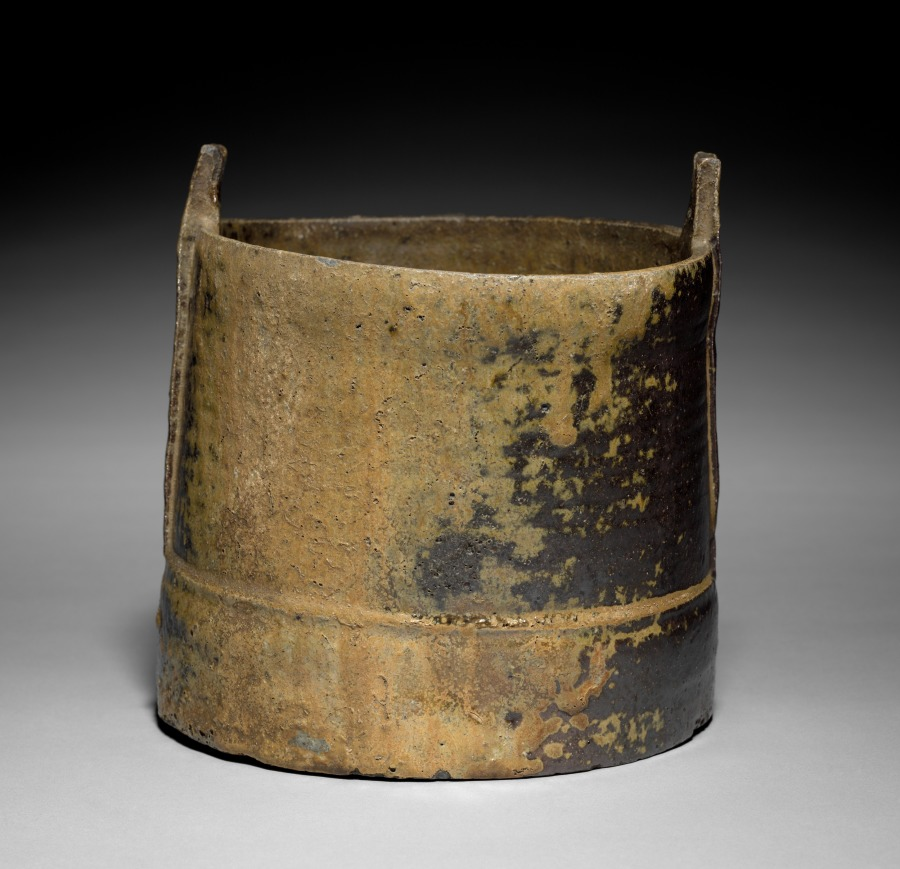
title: Water Container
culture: Japan, Momoyama period (1573–1615)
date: early 1600s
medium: glazed stoneware (Bizen ware, Imbe type)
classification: Ceramic